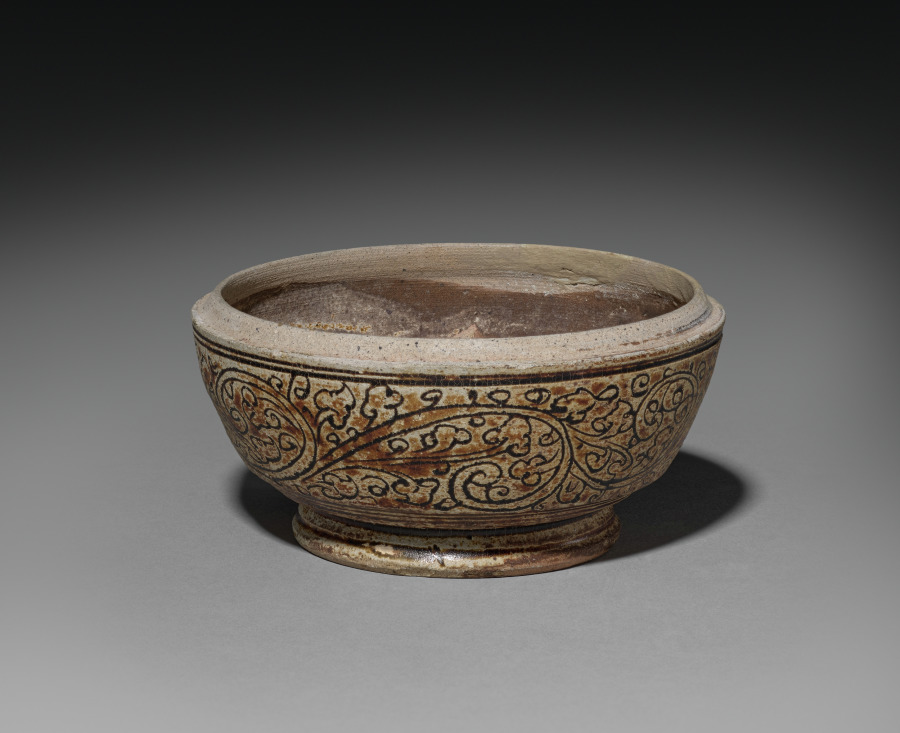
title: Covered Jar, Sawankhalok ware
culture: Thailand, Sukhothai Period, 14th century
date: 1300s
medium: pottery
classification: Ceramic